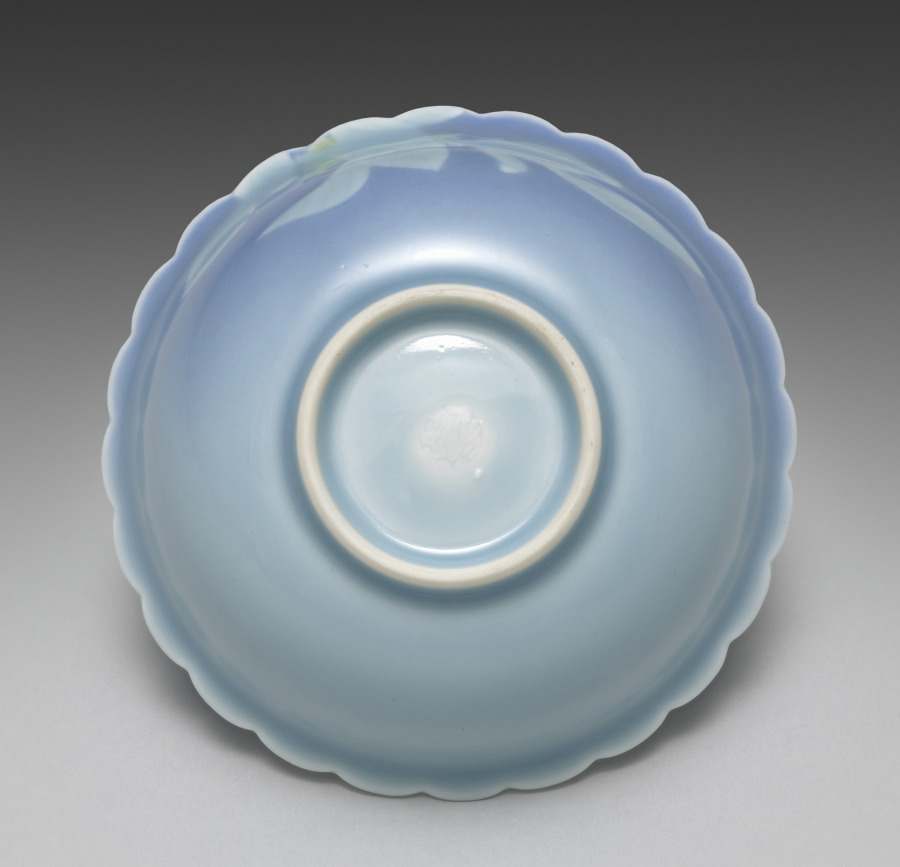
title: Dish from Dishes with Flowers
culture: Japan, Taishō period (1912–26) or Shōwa period (1926–89)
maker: Seifū Yohei IV (Japanese, 1872–1951)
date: 1914–46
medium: One from a set of five dishes; porcelain with underglaze yellow and blue glaze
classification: Ceramic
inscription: 清風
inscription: 清風造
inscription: 成山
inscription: 清風盧人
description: One can imagine a cool summer breeze when looking at this set of dishes, each shaped with a crenulated mouth and glazed with blue. Around the rim and into the basin, the bowls have low-relief designs of flowers with underglaze yellow petals; their leaves and stems show white through the glaze. On each dish, the design continues over the rim onto one side.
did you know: Seifū Yohei IV’s dishes with flowers feature underglaze yellow.